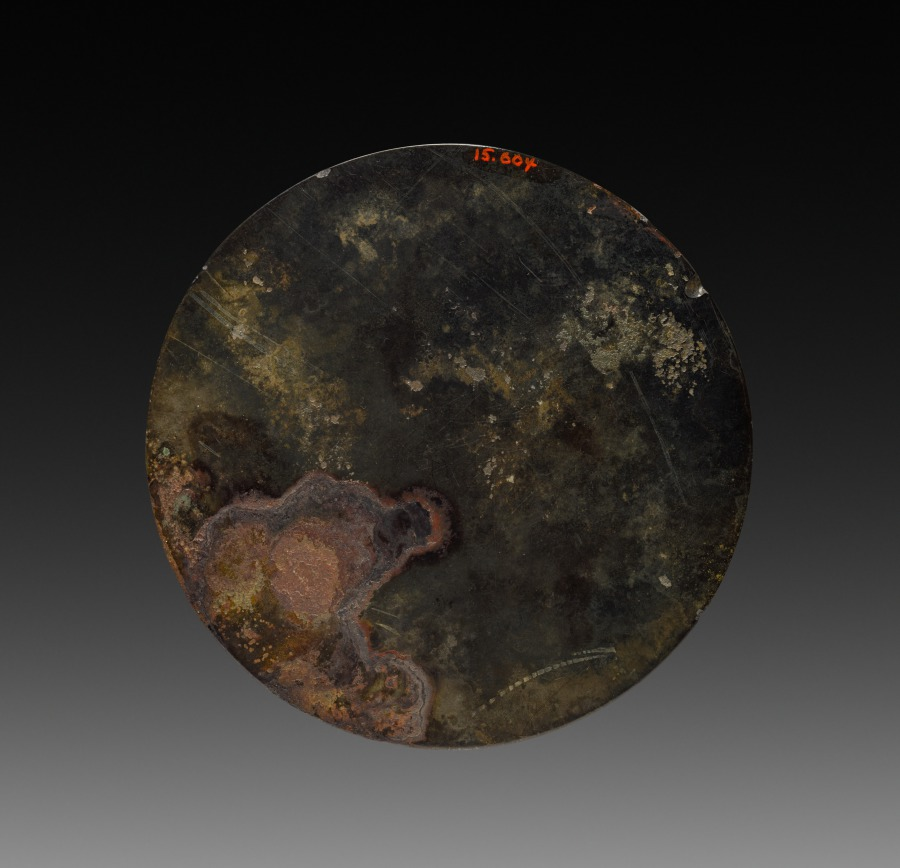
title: Mirror with Concentric Circles and Auspicious Animals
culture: China, Han dynasty (202 BCE–220 CE)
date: 206 BCE–220 CE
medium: bronze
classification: Metalwork